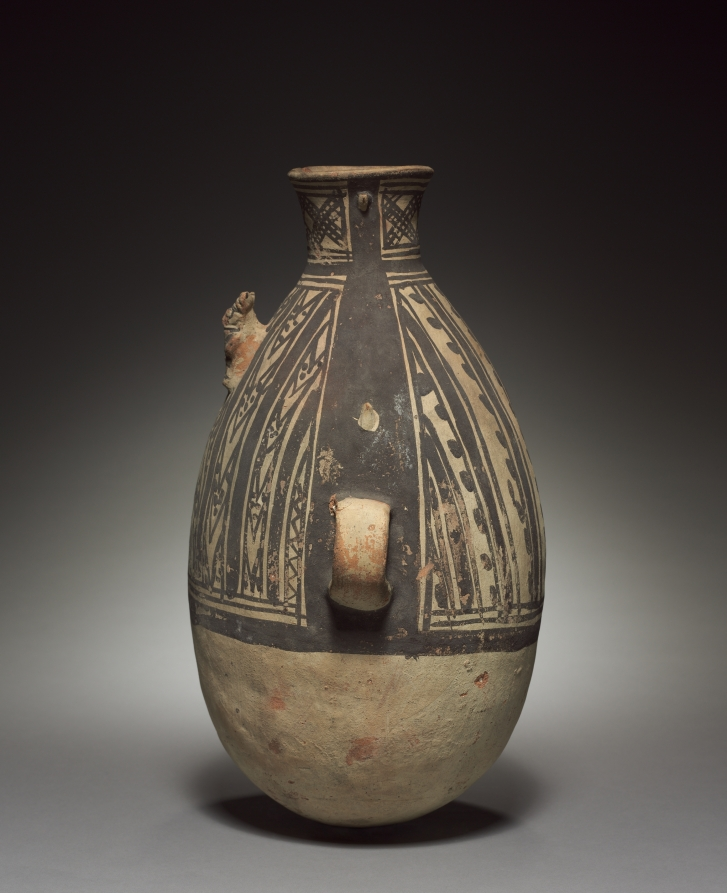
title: Bottle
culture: Peru, Chimú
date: 800–1500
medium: pottery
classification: Ceramic